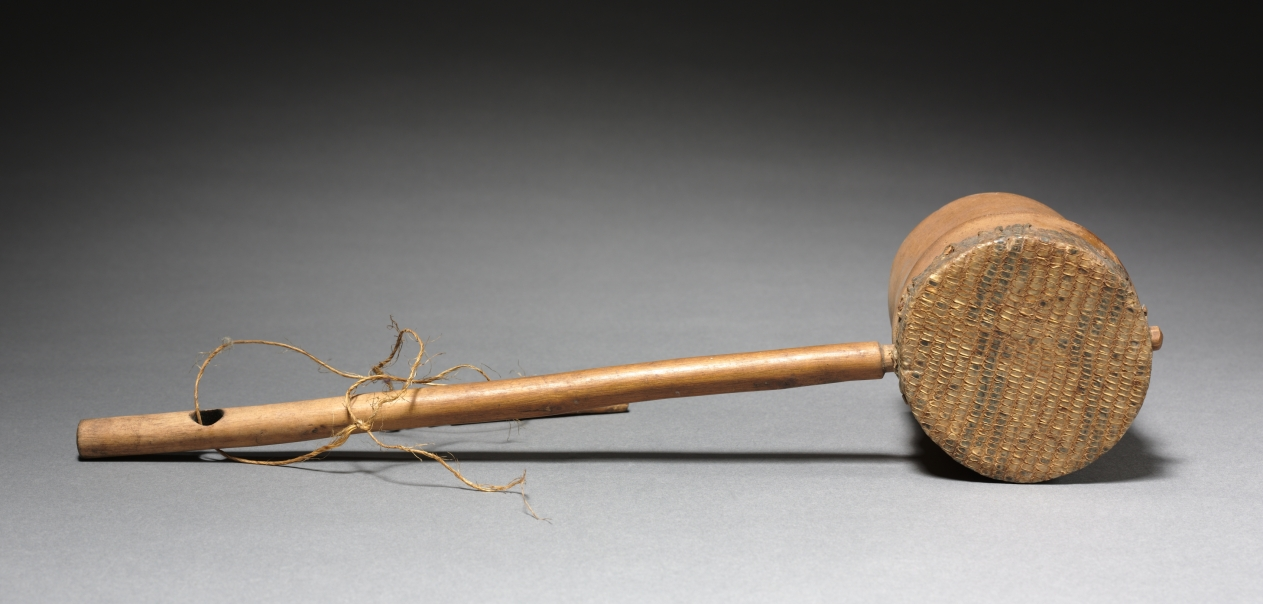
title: Spike fiddle (endingidi or iningidi)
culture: Eastern Africa, Uganda or Rwanda-Burundi, unknown maker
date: 1900s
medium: Wood, snakeskin, and plant fiber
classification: Musical Instrument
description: The endingidi is a single-stringed chordophone musical instrument. Scholars believe it was introduced into the Kingdom of Buganda (in present-day Uganda) between 1904 and 1907. From Uganda, it was later introduced to present-day Rwanda, where it is called iningidi and played by Hutu musicians. Horsehair stretched from the end of the handle and over the reptile-skin–covered tube sound box, and attached to the handle with the wooden tuning peg. A deeply curved bow, now missing, would have allowed a male musician to play the instrument as he held it vertically. Still played today, the music of the endingidi is often heard at weddings or played by royal Bugandan court musicians.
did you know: A photograph taken around 1929 shows that this instrument once had a tassle of long, black animal hair attached to the handle. This tassel beautified the instrument and gave it a dignified "clothed" presence when played at the Bugandan court.